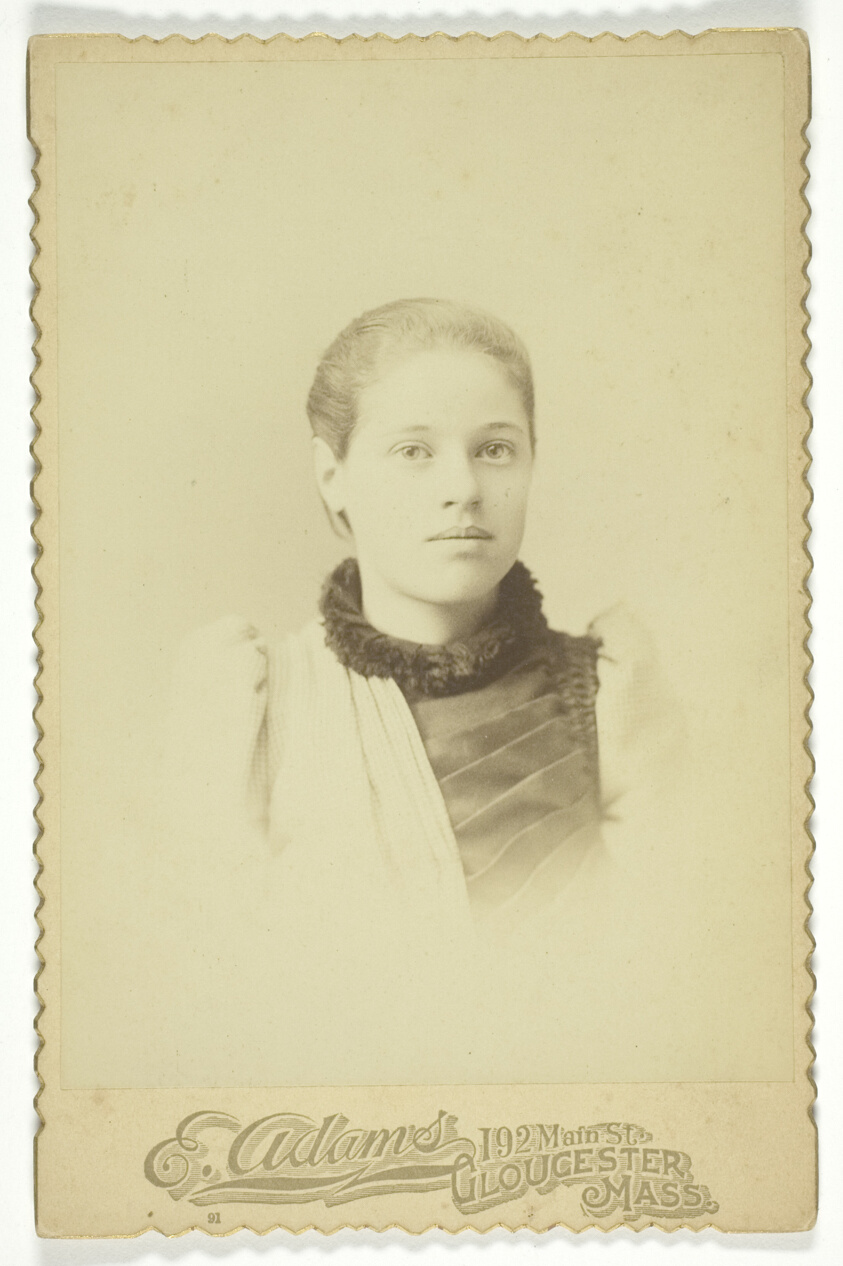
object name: Photograph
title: Portrait of Edith Wonsen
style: 19th century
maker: Artist unknown; American, 19th century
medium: Toned gelatin silver print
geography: Gloucester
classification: photography; photograph